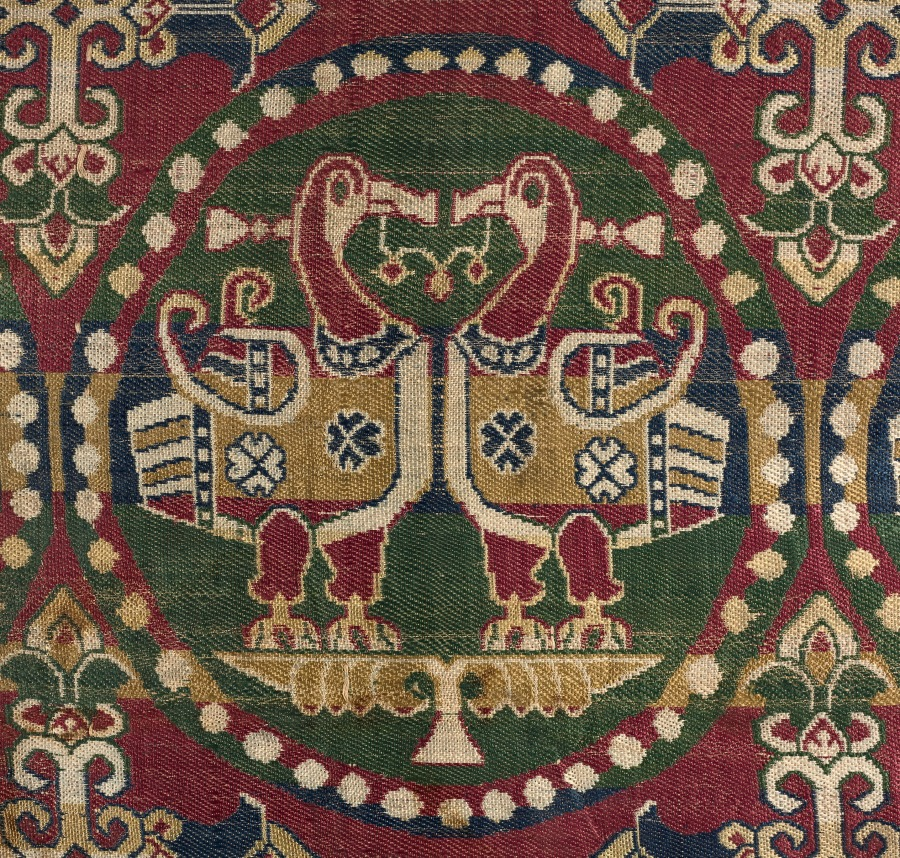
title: Child’s Coat with Ducks in Pearl Medallions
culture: Probably Sogdia (present-day Uzbekistan); China, Tang dynasty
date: 700s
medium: Silk: weft-faced compound twill weave (samite)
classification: Garment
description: The coat’s outer fabric is woven in five brilliant colors featuring paired ducks in pearl roundels, hallmarks of the precious and highly desired silks from Sogdia. The coat’s inner lining is a twill damask with a floral pattern made in China. The combination of Sogdian and Chinese silks in one garment with Tibetan ownership history is evidence of the vital exchange and cultural interaction among the peoples living along the trade routes of the Silk Road. This precious coat was presumably made for a Tibetan prince. Given the coat’s pristine condition, though, it is unclear whether the garment was ever worn, or was used as a diplomatic gift or perhaps as currency.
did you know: This coat is part of a set of garments that originally included an outer pair of pants and silk boots made from the same fabric.